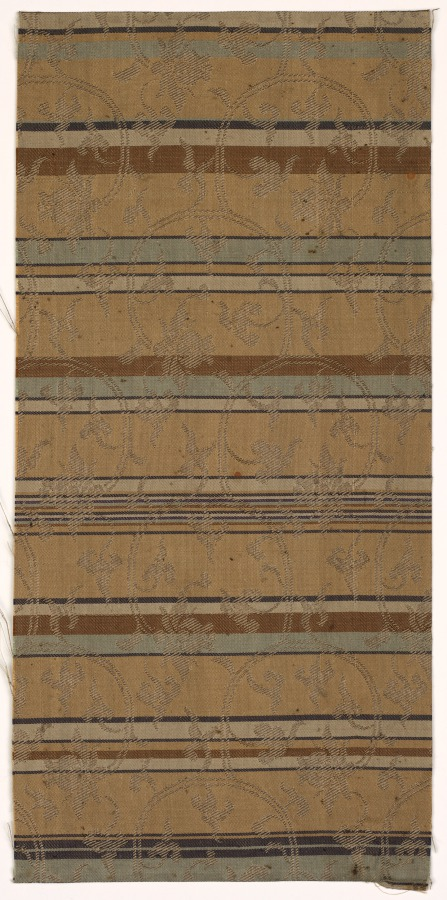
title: Textile Fragment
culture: Japan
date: 1800s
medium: silk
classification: Textile